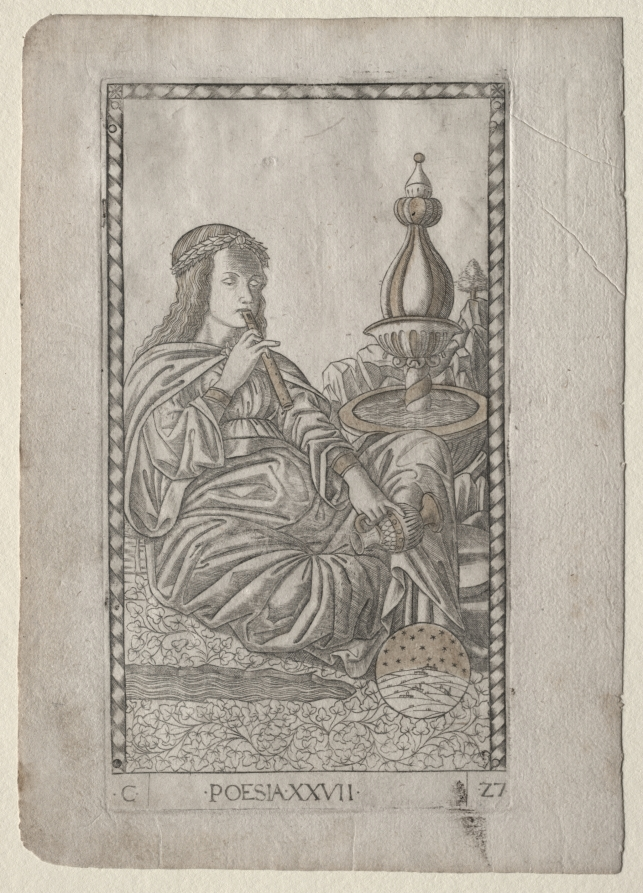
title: Poetry (from the Tarocchi, series C: Liberal Arts, #27)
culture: Italy, Ferrara, 15th century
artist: Master of the E-Series Tarocchi (Italian, active 1460s)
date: before 1467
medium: engraving, hand-colored with gold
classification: Print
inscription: Lettered below the image of Poesia (Poetry): ·C· / · POESIA· XXVII· / ·27·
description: This engraving is part of the group “C” named Liberal Arts. Conceptually, the liberal arts descended from classical antiquity, and were divided into the Trivium (Grammar, Rhetoric, and Dialectic or Logic) and the Quadrivium (Music, Geometry, Arithmetic, and Astronomy). In the Tarocchi set the total number was risen to ten, with the addition of the three disciplines (Poetry, Philosophy, and Theology). The liberal arts denoted knowledge or skills considered necessary to participate in a free society. By the late Middle Ages, they began to be represented in the visual arts as womanlike allegories. Here, Poesia (Poetry) is personified as as a young female figure crowned with a laurel wreath. She is seated in front of Mount Parnassus, next to a fountain. This latter exemplifies the Greek Castalian font, believed by poets to be a source of inspiration. While playing the flute—a symbol of eloquence—Poetry irrigates the earth with inspirational waters taken from the Castalian spring.